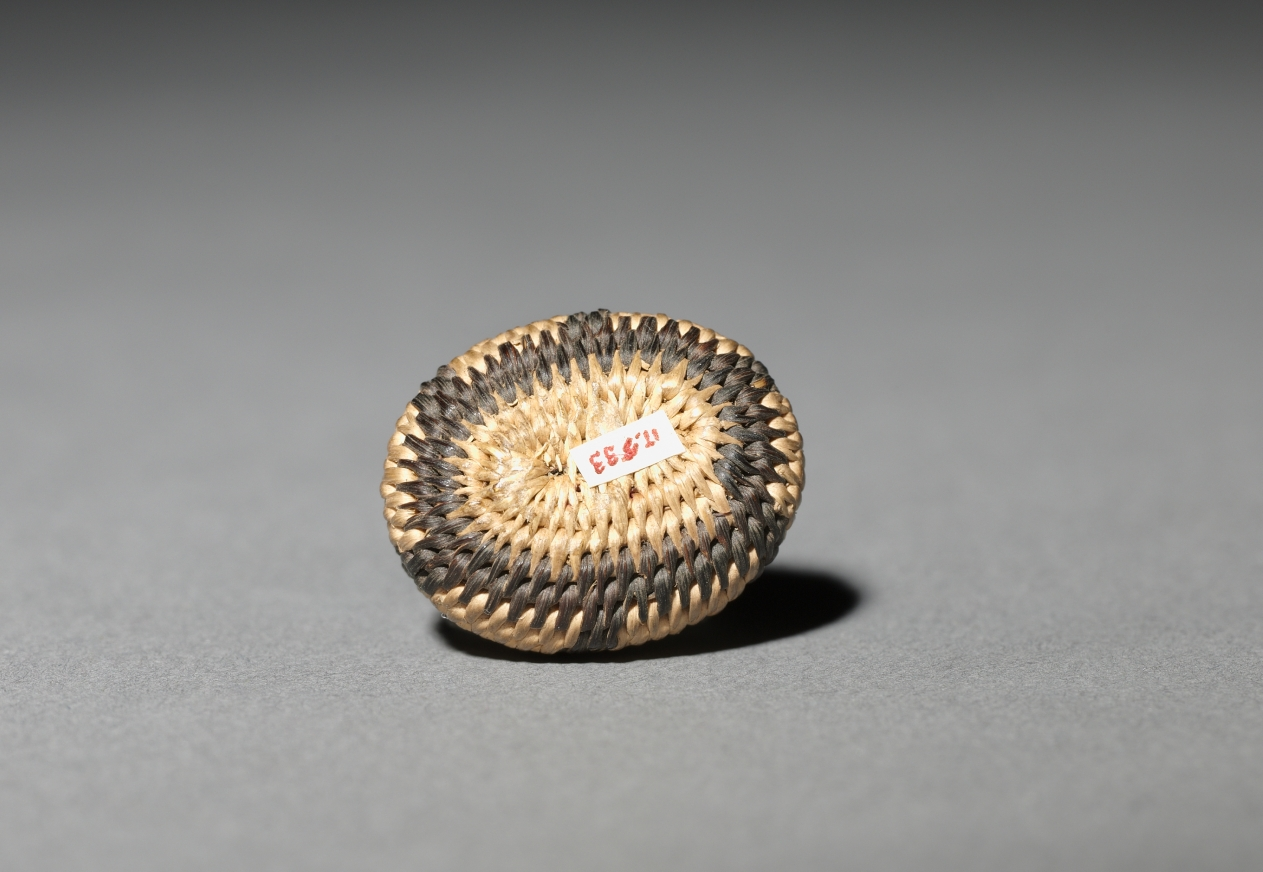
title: Miniature Rhomboidal Basket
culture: California, Pomo, 20th century (?)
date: Early 1900s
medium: coiled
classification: Basketry